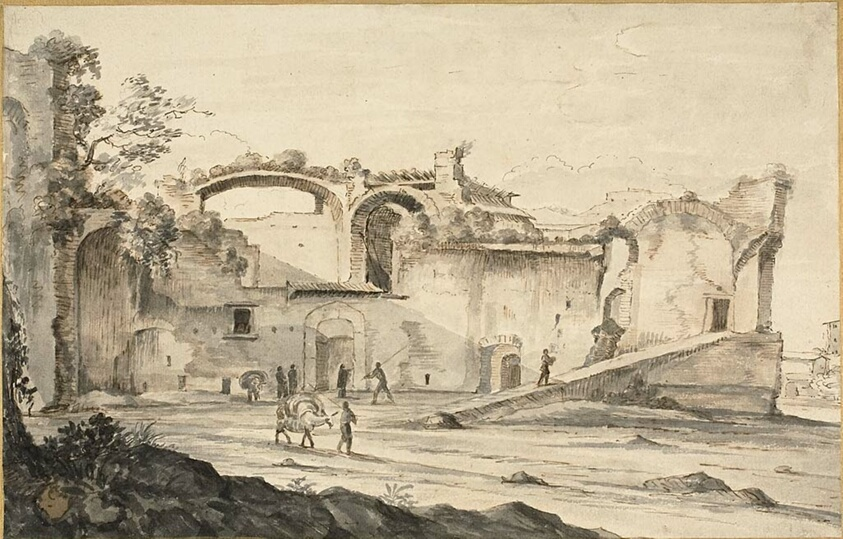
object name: Drawing and Watercolor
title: Travelers before a Ruin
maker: Attributed to Bartholomeus Breenbergh; Dutch, 1598-1657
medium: Pen and brown ink, with brush and gray wash, over traces of graphite, on ivory wove paper, laid down on card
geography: Holland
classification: ink or chalk wash; drawings (visual works); prints and drawing